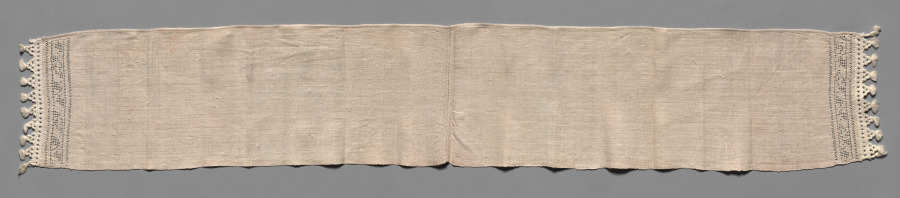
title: Towel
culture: Spain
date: 1900–1920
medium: Plain weave linen: needle lace (drawnwork); cotton: applied fringe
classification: Textile